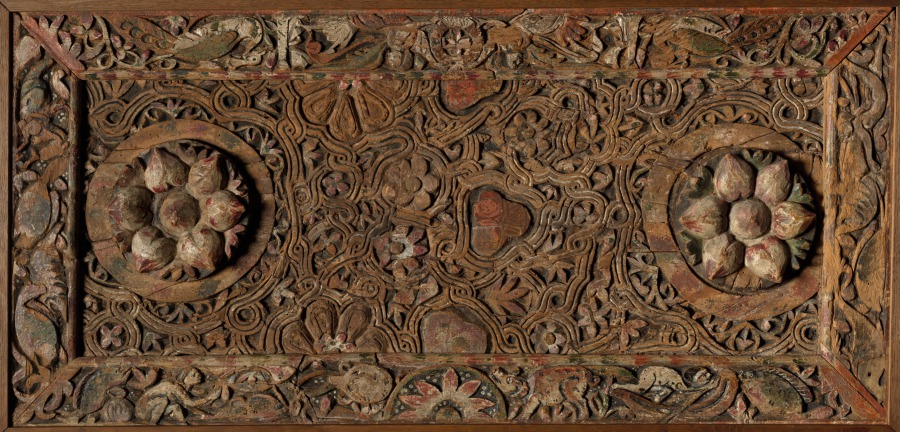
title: Ornamental Panel (from a Ceiling?)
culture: Egypt, Coptic period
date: 500s (frame) and 700s (central panel)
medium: wood with paint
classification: Furniture and woodwork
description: This wooden panel and its frame come from different locations. The four narrow panels forming the outer frame are stylistically datable to the 500s. The large central rectangular panel might date to the 700s. It is most likely a carved ceiling, but its architectural context is unknown. Both panel and frame have been cut down and joined together at some point in their history under unknown circumstances. The decorative program of the main panel features two large rosettes surrounded by florets, leaves, and fruit. The outer frame features two flying angels holding a wreath, a peacock, an octopus, a seated fisherman who holds a long line with a fish attached, and a swimming boy with a dolphin. The vocabulary of the frame is dominated by water life, particularly of the Nile and its banks. Though separated from its original place and altered, this important object provides a welcome glimpse of an architectural interior from early Christian Egypt.